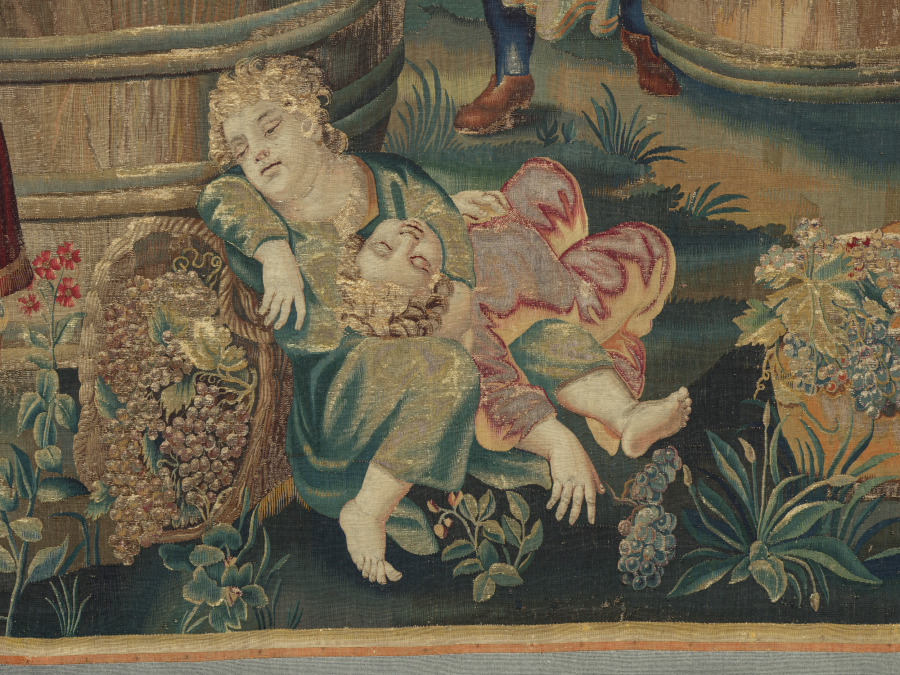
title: Autumn: Vintage Scene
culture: France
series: Four Seasons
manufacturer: possibly by Gobelins Manufactory (France, Paris, est. 1662)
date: designed c. 1535, woven mid- to late 1600s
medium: Wool, silk, and gold filé: tapestry weave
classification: Tapestry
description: In 16th-century Europe, the grape harvest took place in autumn, a tradition that persists among vintners to this day. Here, men and women gather grapes in buckets and drop them into an enormous wood vat. Two men stomp on the ripe grapes, squeezing out the juice. A man on the far right pours the juice into barrels, where it will ferment into wine. Children sleep or play in the foreground; one mischievous toddler presses grape juice into the mouth of another small child. In the distance four couples dance to music provided by a bagpiper, who is perched in a tree.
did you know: Originally green, the plants were woven using yarn first dyed blue and then dyed yellow; over time the yellow dye has faded so that today the plants appear blue.